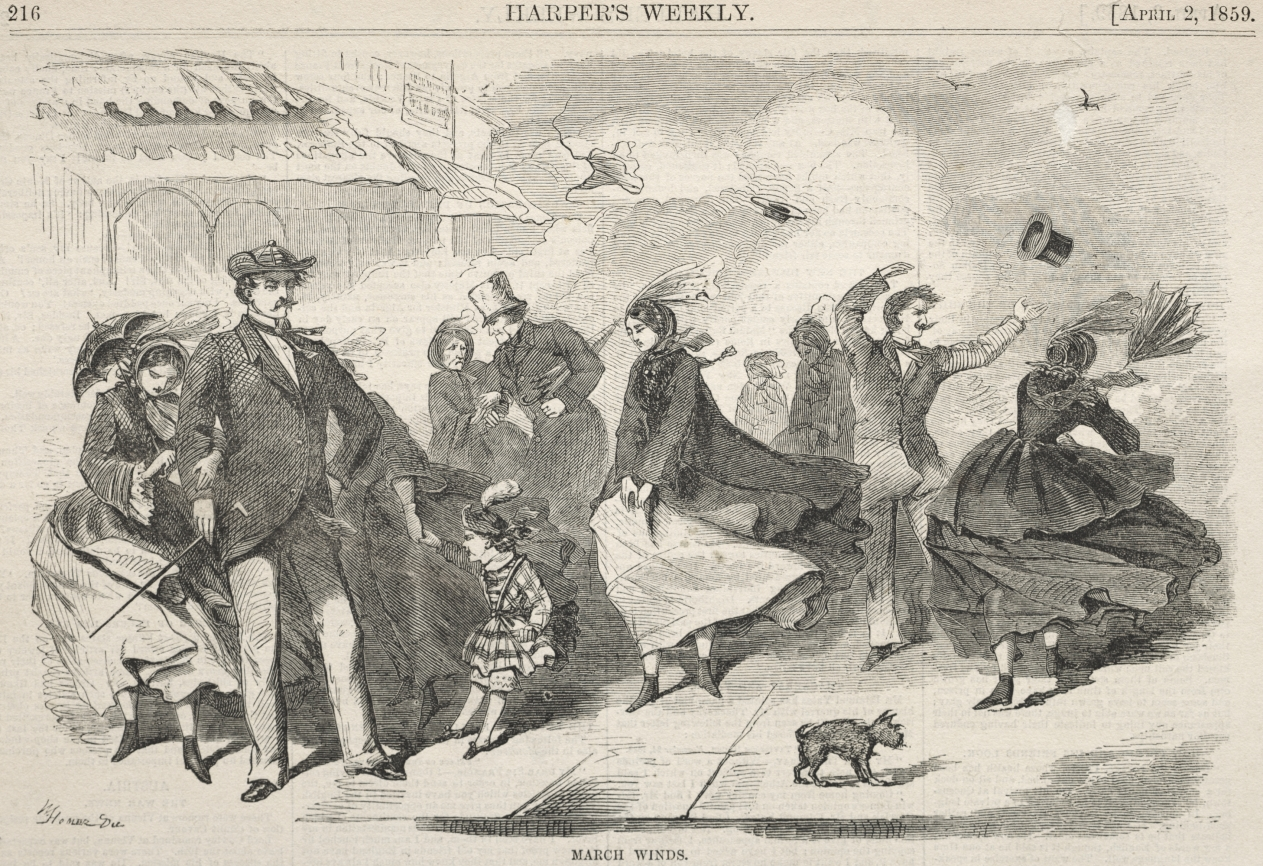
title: March Winds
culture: America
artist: Winslow Homer (American, 1836–1910)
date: 1859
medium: wood engraving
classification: Print